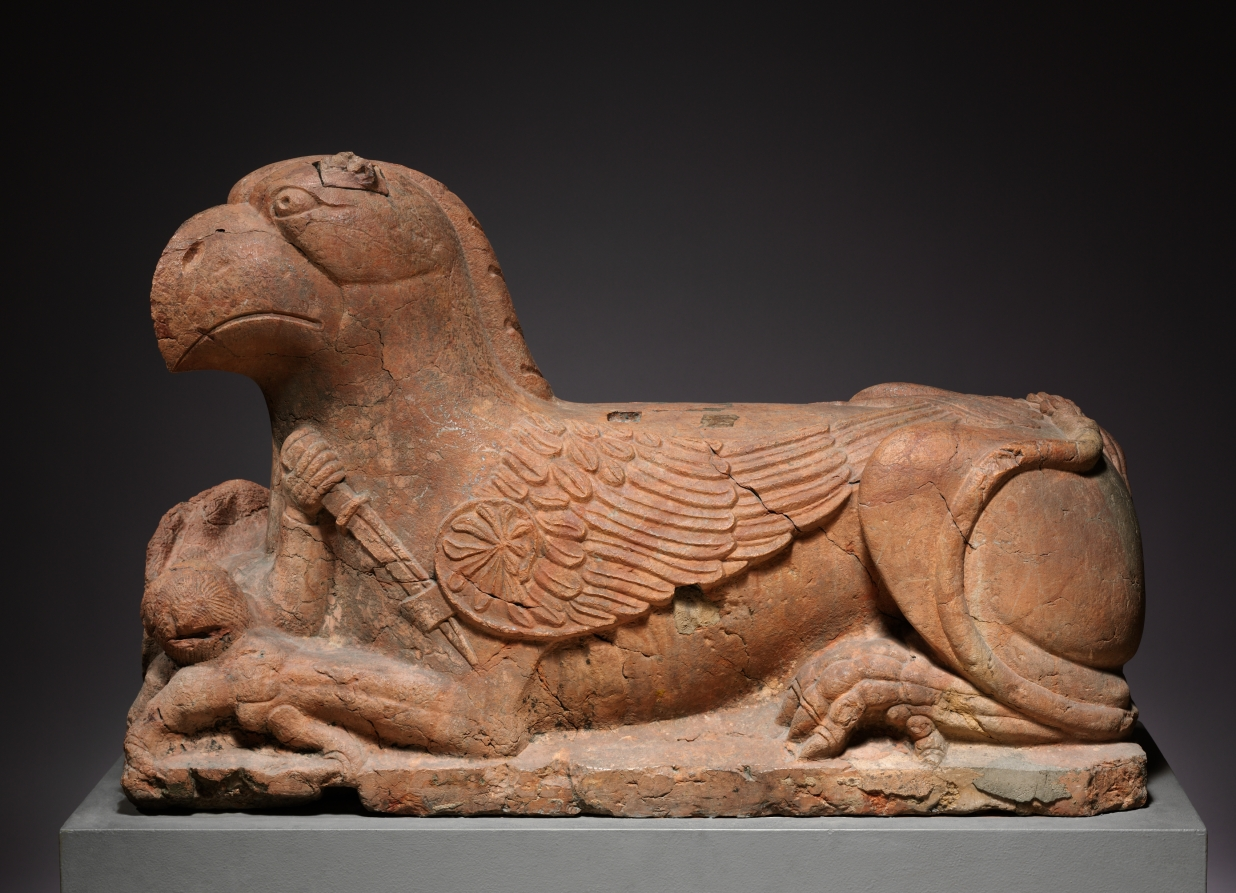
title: Guardian Griffin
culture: Northern Italy, Emilia, 12th century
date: 1150–1175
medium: pink limestone (called "Verona Marble")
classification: Sculpture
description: Griffins are fabled creatures that have the characteristics of an eagle and a lion--combining watchfulness and courage. In Christian art, the dual nature of the griffin was often used to signify that of Christ himself: divine (bird) and human (animal). Griffins were often used as guardian figures in church sculpture and were placed in portals and choir screens. The creatures seen here, with their inward-turning heads, were certainly used for such a purpose. When viewed from the front, one griffin may be seen protecting the figure of a knight between its paws, while the other griffin guards a calf. Their original function was probably to support the columns of a porch in front of a church doorway.